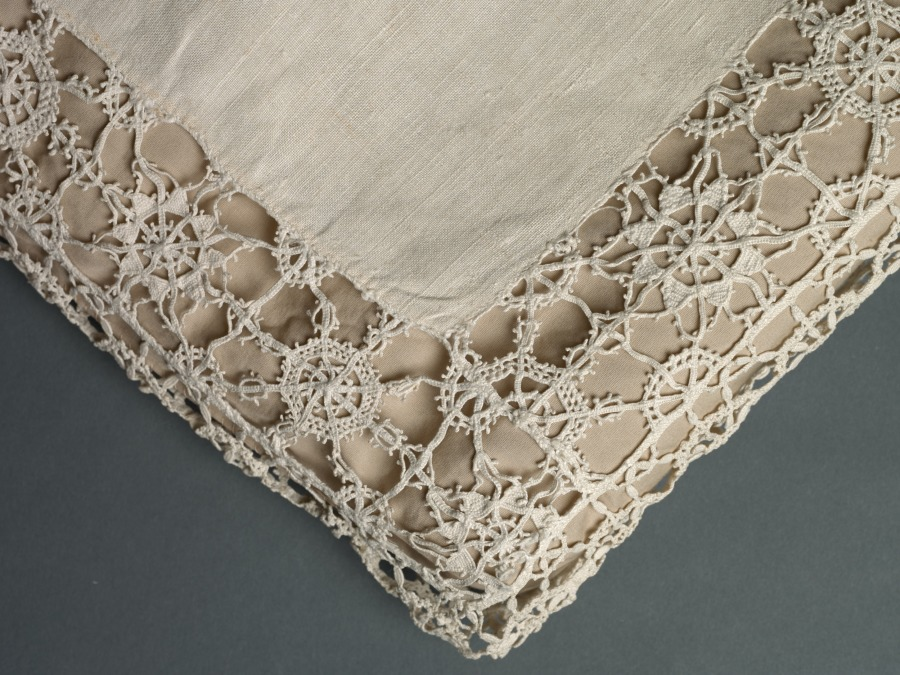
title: Lace Pillow Cover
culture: Italy, Genoa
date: 1600s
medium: Linen: needle lace (reticella) and bobbin lace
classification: Lace